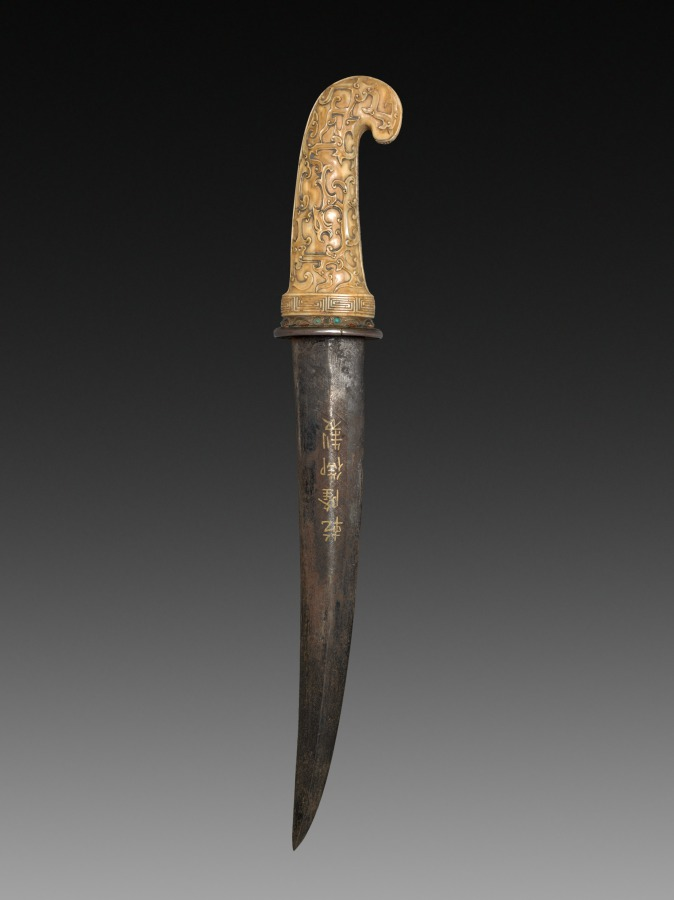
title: Small Sword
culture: China, Qing dynasty (1644-1911)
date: 1800–1911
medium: metal blade, ivory handle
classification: Arms and Armor